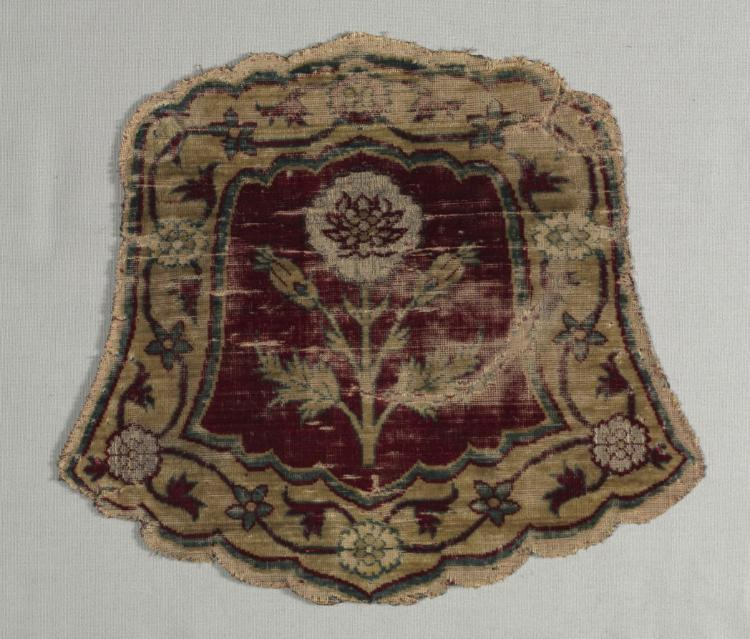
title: Shaped horse trapping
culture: India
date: 1600s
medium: velvet, brocaded and pile warp substitution: silk and gilt-metal thread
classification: Velvet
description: The scrolling floral vines in the border and the combination of gold with imperial crimson resonate with the painted depiction of the textiles that accompany portraits of the emperor. The poppy plant in the center can be identified by the leaves with multiple lacy points and may reference the opium in which Emperor Jahangir indulged daily.